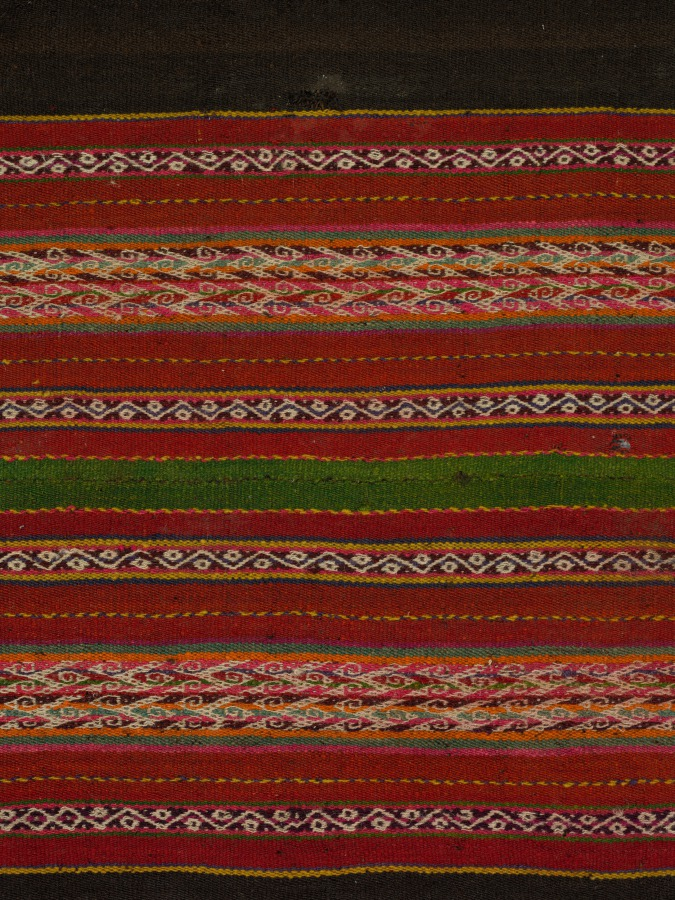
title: Warp Patterned Cloth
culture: Bolivia, Salinas, late 19th century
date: late 1800s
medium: wool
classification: Textile